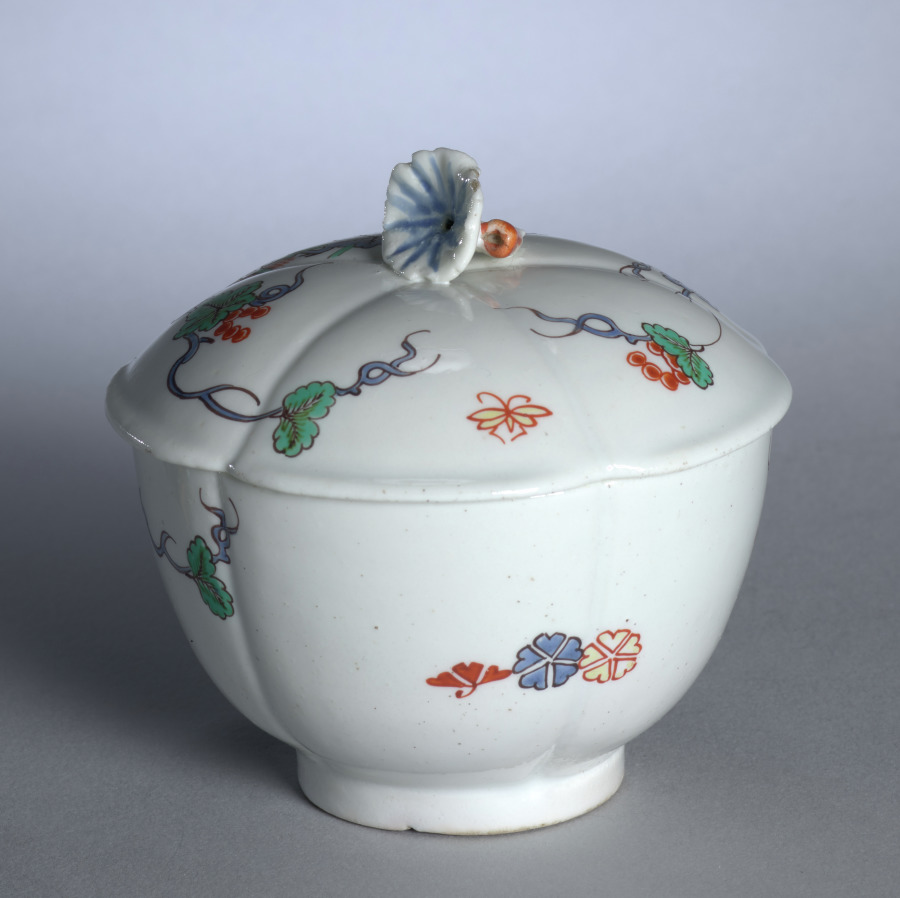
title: Sugar Bowl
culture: France, Chantilly, 18th century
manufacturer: Chantilly Porcelain Factory (French)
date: c. 1730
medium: soft-paste porcelain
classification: Ceramic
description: The pieces composing this individual tea set are entirely typical of Chantilly soft-paste porcelain in the Kakiemon style. Both the form and decoration of these pieces were inspired by Japanese prototypes. The use of knobs in the form of trumpet-shaped blossoms is characteristic of Chantilly wares.